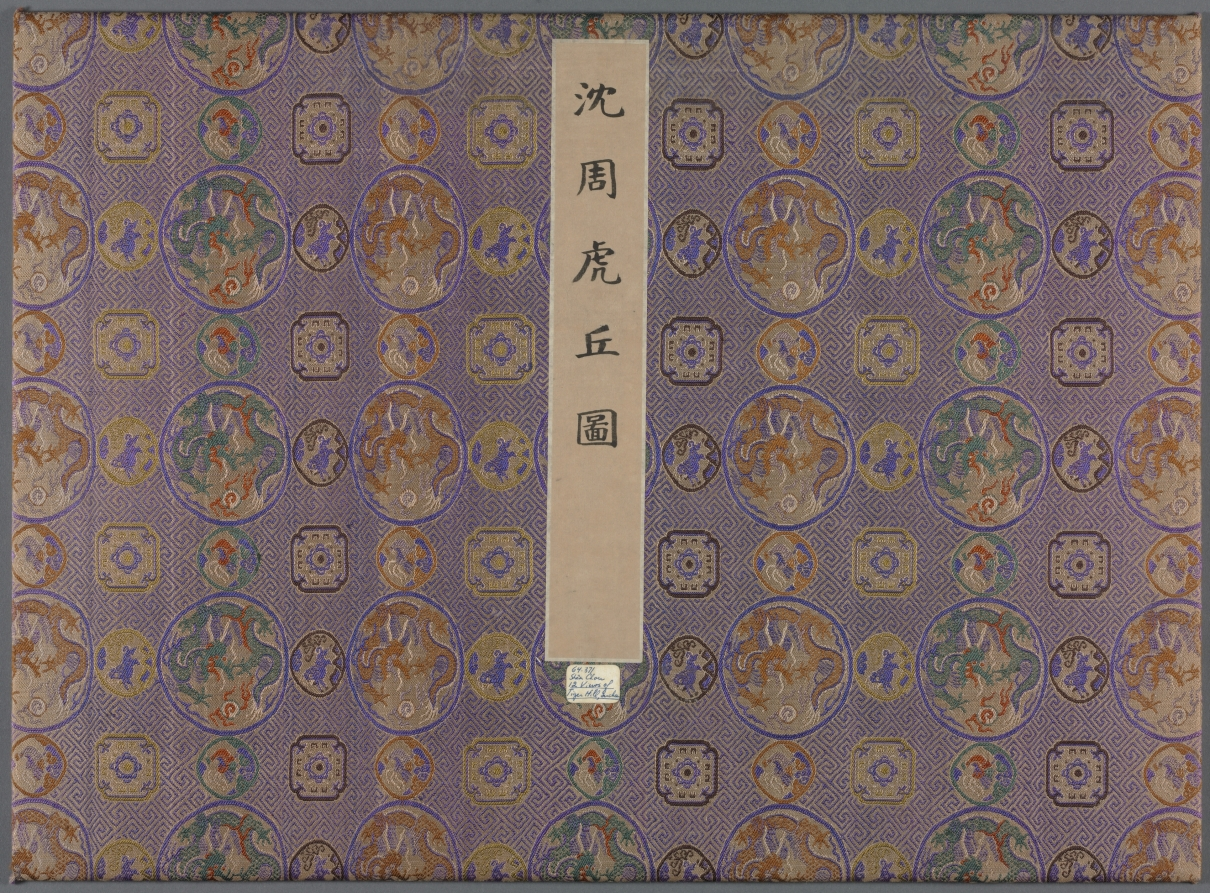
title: Twelve Views of Tiger Hill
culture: China, Ming dynasty (1368–1644)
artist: Shen Zhou (Chinese, 1427–1509)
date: after 1490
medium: Album of twelve leaves; ink or ink and slight color on paper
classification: Painting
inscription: [印] 启南; 石田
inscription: 1 colophon and 1 seal of Yao Yuanzhi 姚元之 (1776-1852). The brushwork of this album is aged and powerful. It is so vigorous that it gives you a feeling of the mist and clouds when looking at it. It could not be done by any other than the old master, Shen Zhou. Formerly the album was in the collection of Hu Zhishou's 胡之壽 family. After many changes of hands, it came finally into the possession of Ligeng 笠耕, the Keeper of the Imperial Stable [that is, Binliang 斌良, Manchurian poet-calligrapher, later the Imperial Resident in Lhasa, Tibet, 1784-1847]. Not long ago, when its former owner Zhishou came to visit me and found the album in my study, he sighed in nostalgia and told me that there were originally an inscription and colophons in the album which are now lost. Song Luo 宋犖 [zi 牧仲, 1634-1713] once had a poem by Shen Shitian on the painting of Tiger Hill. [The poem is missing from the album.] It must be a poem written for this album. However, according to Song's own title, the poem was composed after the rhymes and meter of the original poem on the album. Now there is no poem whatsoever in the frontispiece or at the end of the album. Is this what Zhishou meant - that the original colophons and inscriptions are missing? Ligeng, the Keeper of the Imperial Stable, has asked me for a colophon. The album has been left on my desk since last year. How time has passed! On the first day of the jiashen year 甲申 [1824], I returned from the Court Audience. The plum trees in the pots have started to blossom with their first fragrance. How much has this added to my enjoyment of the painting! I therefore write down a few words for your criticism. [signed] the Student of the Grass Leaf Pavilion, Yao Yuanzhi.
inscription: 3 seals of Hou Shigong 侯士恭 [late 19th–early 20th century]. (1 each on the colophon, seventh, and eleventh leaves).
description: Views of Tiger Hill depicts a historic site a few miles northwest of Suzhou. The scenes simulate a visit from arriving by boat at the foot of the mountain to climbing to Cloudy Cliff Monastery. Representations of the artist’s mature style, Shen Zhou included views in subtle colors in the suite of monochrome scenes. A Suzhou native, Shen Zhou was supported by family wealth and rejected an official career in favor of life as a retired scholar. Turning to painting in midlife, he is regarded as the founder of the Wu School of painting, with its center in Suzhou.